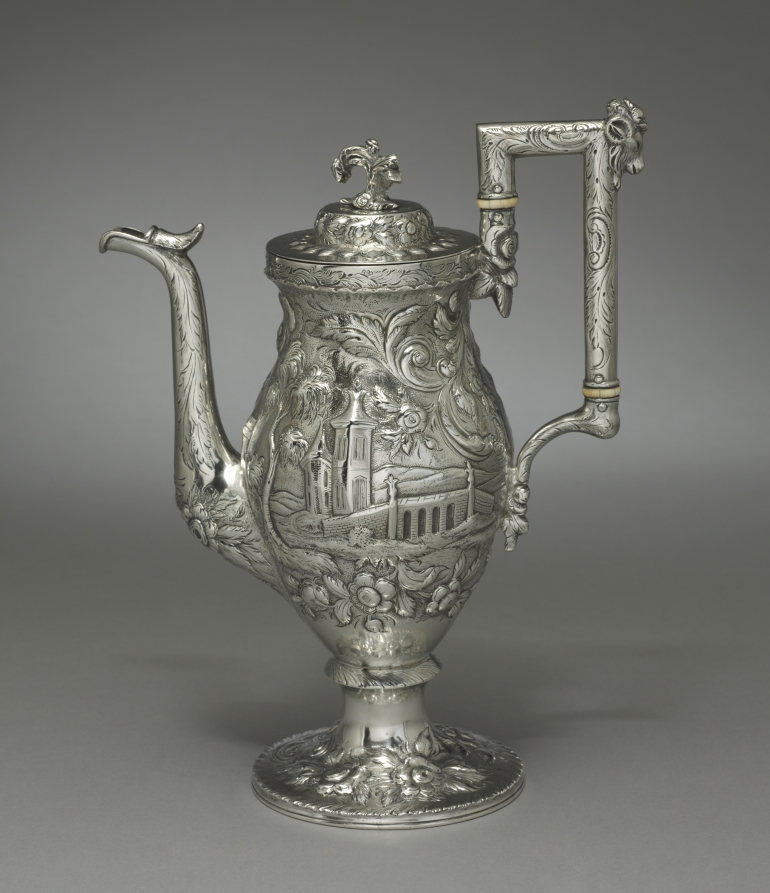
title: Neo-Rococo Coffee Pot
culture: America, Baltimore, 19th century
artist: Samuel Kirk (American, 1793–1872)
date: c. 1840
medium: silver and ivory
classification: Silver